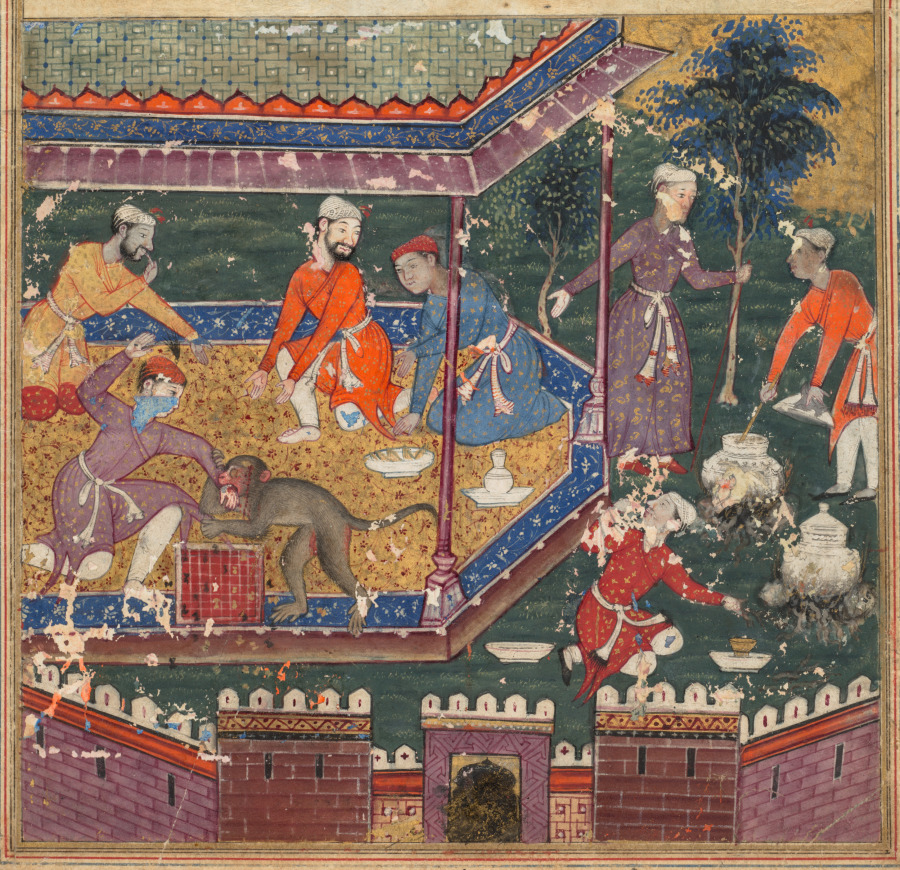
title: The wounded monkey bites the hand of the prince, his chessmate, in the presence of guests, from a Tuti-nama (Tales of a Parrot): Fifth Night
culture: Mughal India, court of Akbar (reigned 1556–1605)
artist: Dasavanta (Indian, d. 1584)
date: c. 1560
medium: gum tempera, ink, and gold on paper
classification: Painting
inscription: 'amal daswant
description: This painting depicts a scene from the cautionary tale the mother parrot tells her young to warn them that interspecies friendships, like theirs with the fox cubs, are a bad idea. She tells them that there once was a monkey who could play chess, and he enjoyed many games with a prince. When the prince invited dignitaries for a party, the monkey made a bad joke, the prince slapped him, and the monkey bit him in return. At the left, food is prepared as the guests look on in astonishment. An inscription at the bottom of the page names the artist, who went on to become one of the most celebrated Indian masters at the Mughal court.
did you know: Young master artist Dasavanta put a layer of cool blue color under his painting.